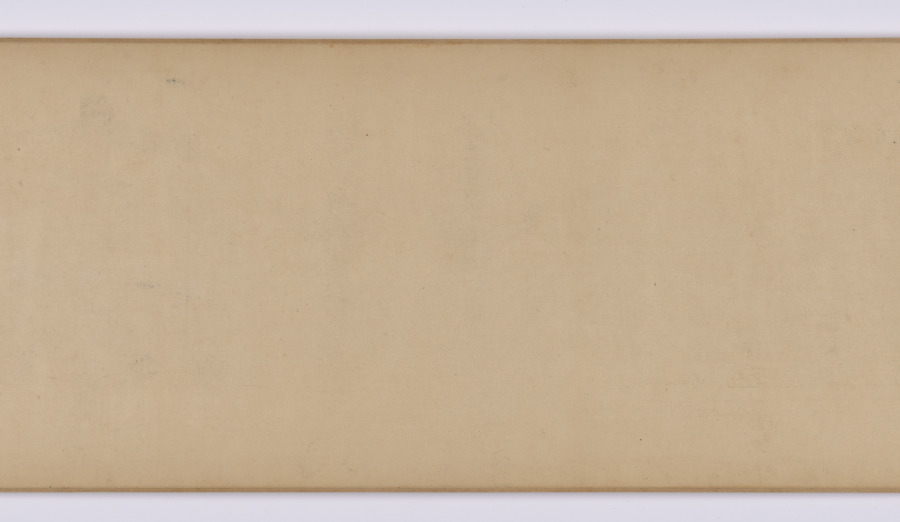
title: Poetic Feeling in a Thatched Pavilion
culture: China, Yuan dynasty (1271-1368)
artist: Wu Zhen (Chinese, 1280–1354)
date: 1347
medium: handscroll; ink on paper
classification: Painting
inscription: 依村構草亭，端方意匠宏。 林深禽鳥樂，塵遠竹松輕。 泉石俱延賞，琴書悅性情。 何當謝凡近，任適慰平生。 至正七年丁亥冬十月，為元澤戲作草亭詩意。梅沙彌書 [印]楳華盦; 嘉興吳鎮仲圭書畫記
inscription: 我愛梅花翁，巨老傳心印。 脩此水墨缘，種種得蒼潤。 樹石墮筆鋒，造化不能吝。 而今橡林下，我願執掃汛。 後學沈周 [印]启南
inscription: Colophon by Chen Rentao (1952): 予求梅道人畫二十年不可得。所見多膺鼎，即故宮所藏山水數軸都不可靠。傳世真迹，惟《漁父圖》、《嘉禾八景》與此《草亭詩意》而已。壬辰十月十四日余大病初愈，居家休養，研山師忽持此圖相贈。展卷披覽，頓覺精神沛振，如服僊藥。同日又得宋拓柳公權《神策軍紀聖德碑》，及群玉堂藏《真草書千(字)文》，皆海內孤本。一日得數寶，欣喜何如，書以志幸。 陳仁濤識 [印]陳氏仁濤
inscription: Colophon by Chen Rentao: 此圖作於至正七年丁亥，時年六十八，盖其晚年神品也。 濤又識 [印]陳仁濤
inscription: Title on frontispiece by Li Dongyang 李東陽 (1447-1516).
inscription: 33 additional seals: 1 seal of Li Chao-heng 李肇亨 (1592-1664)：檇李李肇亨書畫記; 9 seals of Liang Qingbiao 梁清標 (1620-1691): 蒼巖子、蕉林、蕉林梁氏書畫之印、蕉林秘玩、蕉林書屋、蕉林玉立氏圖書、棠邨 (appears twice)、棠邨審定; 1 seal of Wang Yirong (1845-1900): 懿榮; 3 seal of Li Yanshan (1898-1961): 雙銕笛樓 (appears twice)、硯山心賞; 12 seals of Chen Rentao 陳仁濤（1906-1968）：陳氏仁濤、陳仁濤珍藏印、金匱寶藏·陳氏仁濤 (appears three times)、金匱秘笈、金匱室、金匱室精鑒璽 (appears twice)、金匱室主、金匱神品、仁濤奇緣; 1 seal: 崐溟居士; 1 seal: 林止在㭯生圖書印; 3 seals unidentified.